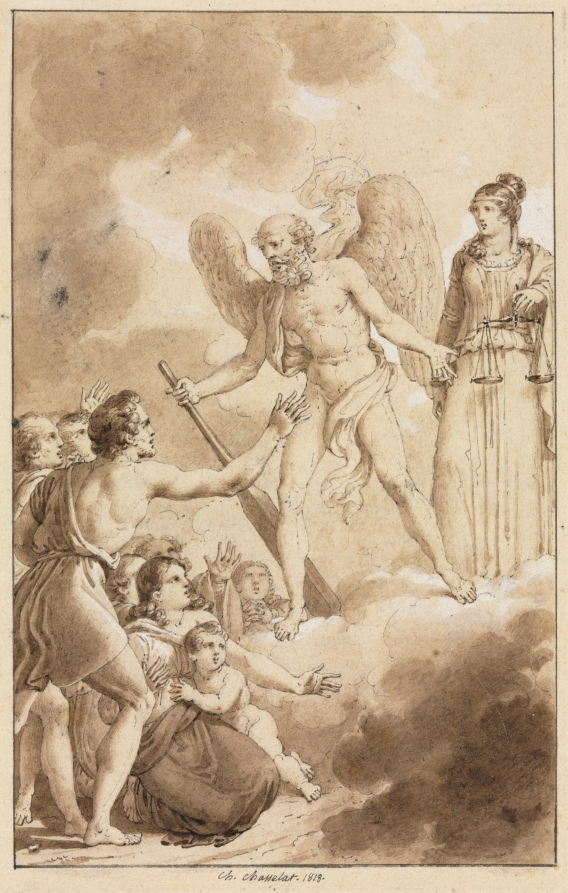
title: Allegory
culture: France, 19th century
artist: Charles Abraham Chasselat (French, 1782–1843)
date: 1818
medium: pen and black ink and brush and brown wash, heightened with white gouache; framing lines in black ink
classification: Drawing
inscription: signed, lower center, in black ink: Ch. Chasselet. 1818.